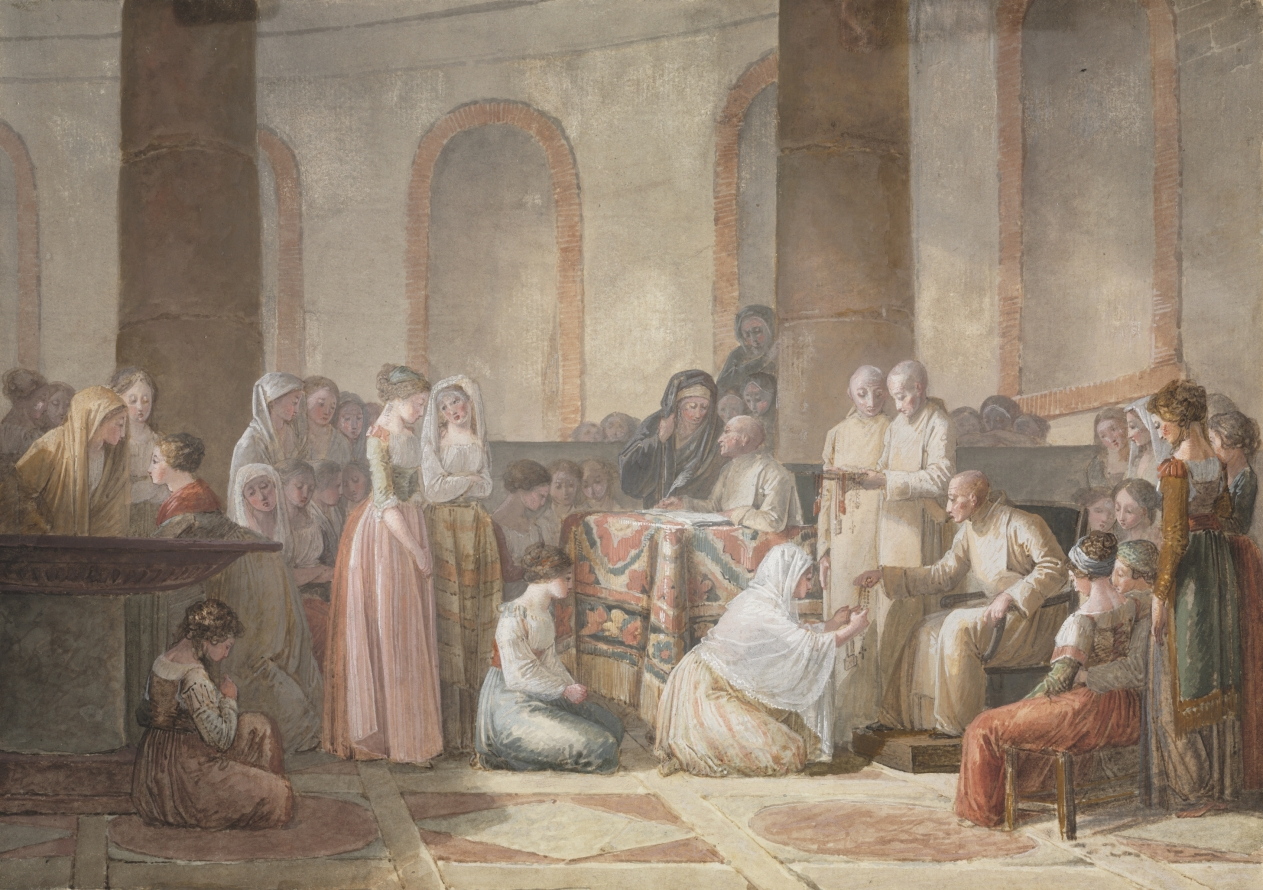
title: The Distribution of Rosaries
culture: France, 18th/19th century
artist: Jean-Baptiste Mallet (French, 1759–1835)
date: 1793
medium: Watercolor and gouache with graphite underdrawing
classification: Drawing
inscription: inscribed on verso in brown ink: "Mallet inv fecit 1793 / pur M de Maussion"